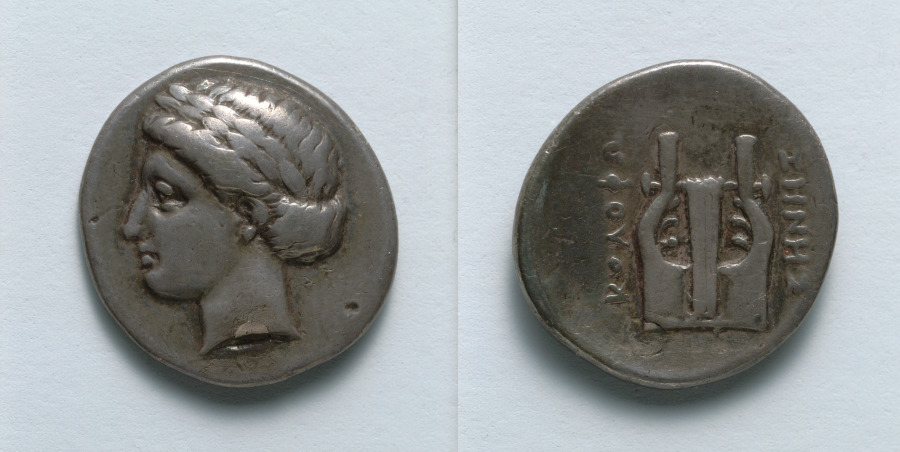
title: Drachm: Head of Apollo (obverse); Lyre (reverse)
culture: Greek, minted at Kolophon (Ionia)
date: c. 389–350 BCE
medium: silver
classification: Coins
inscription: ΙΗΝΗΣ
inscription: ΚΟΛΟΦΩ